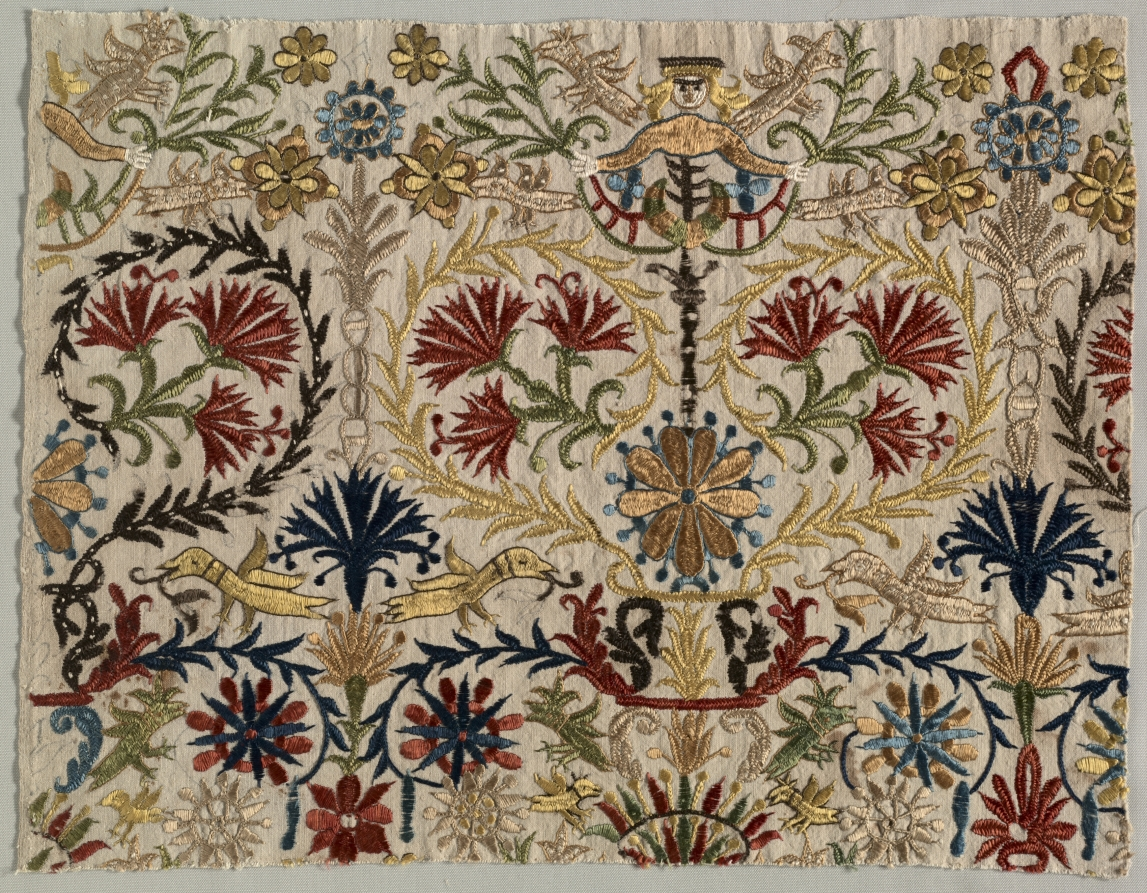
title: Fragment of a Bed Curtain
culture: Greece, Crete, 17th-18th century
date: 1600s - 1700s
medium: embroidery: silk on linen tabby ground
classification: Embroidery